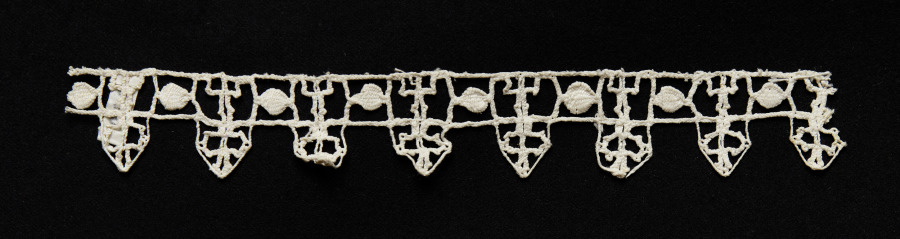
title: Lace Edging of Points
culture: Italy, Genoa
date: 1550–99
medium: Bobbin lace (needle lace, reticella and punto in aria designs)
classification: Lace